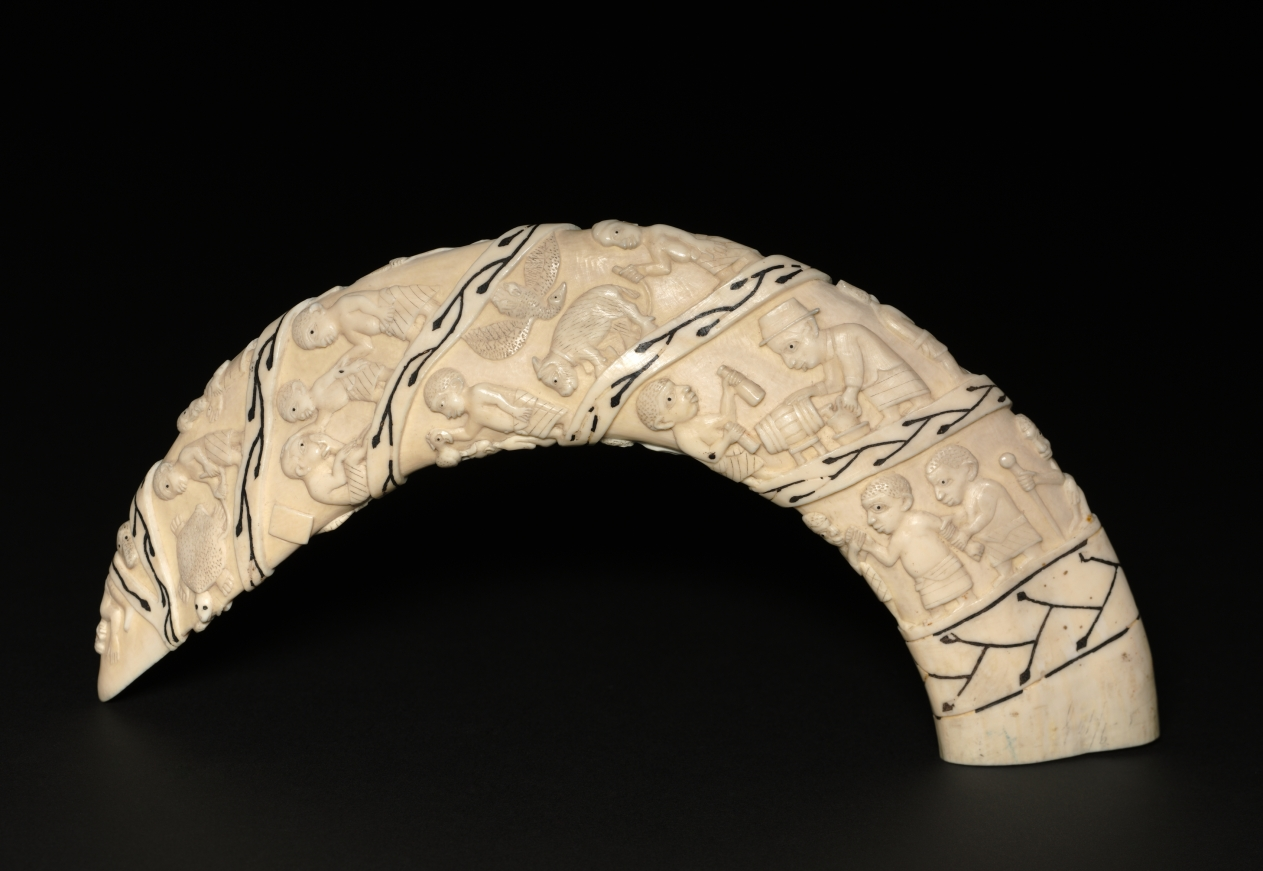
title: Carved Tooth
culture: Africa, Central Africa, Democratic Republic of Congo, Cabinda, or Republic of the Congo, probably Vili-style maker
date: late 1800s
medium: Hippopotamus ivory and organic material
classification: Sculpture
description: This is a fine example of art produced for sale to European visitors in the Lower Congo River area. A long history of cultural and artistic interactions between Africans and Europeans began in 1482, when the Portuguese first established diplomatic ties with the rulers of the Kongo kingdoms. Note the image of a foreign merchant pouring whiskey from a keg.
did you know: Spiral motifs have been found on Kongo Kingdom ivory carvings since at least the 1500s.